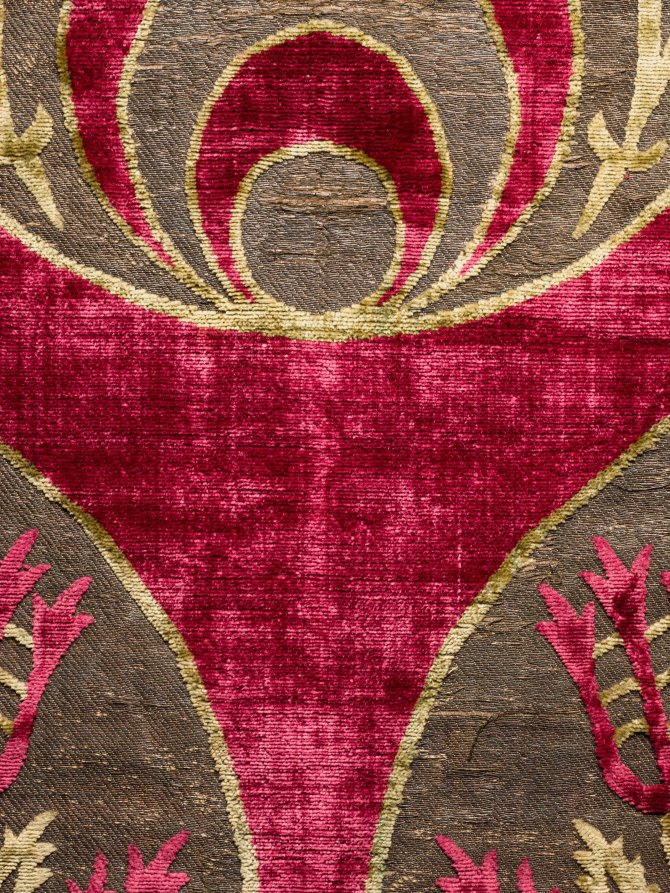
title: Brocaded velvet cushion cover with crescents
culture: Turkey, Istanbul or Bursa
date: 1525–75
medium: velvet, brocaded: silk, gilt- and silver-metal thread, and cotton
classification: Velvet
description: This cushion cover is one of the earliest and highest quality examples that has survived. The vibrant pattern displays large crescents inscribed with smaller crescents and elegant rosebuds on a leafy vine. The six-pointed lappet designs across each end identify its function as a cover for a cushion on a divan, the equivalent of a Western sofa. The elegant yet lively quality of the drawing, velvet weave, and dense metal thread indicate that it was made near the height of Ottoman silk textile production in the mid-1500s.